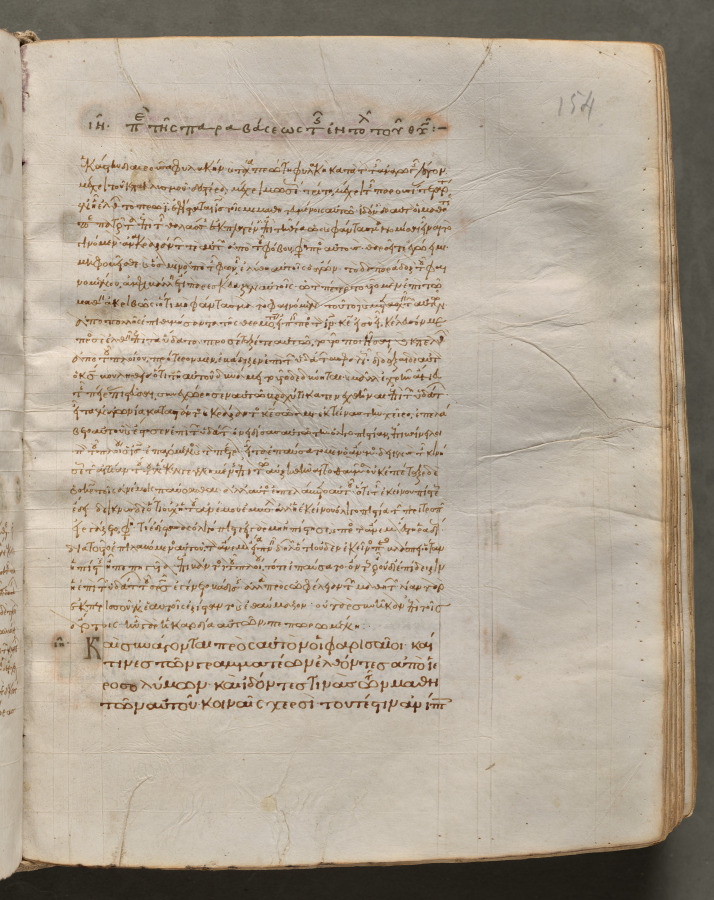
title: Text, folio 154 (recto), from a Gospel Book with Commentaries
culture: Byzantium, Constantinople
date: c. 1000–1100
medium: ink, tempera, and gold on vellum; leather binding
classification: Bound Volume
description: Each of the four gospels in this book opens on a page with brilliantly illuminated borders depicting the author of the text as well as birds-principally peacocks, symbols of the immortality of the soul-and fountains, representing the fountain of life and the salvation of the soul. This volume consists of 428 leaves with texts in Greek. Its level of sophistication suggests that it was probably written and decorated in a monastery in Constantinople.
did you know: Gospel Books were carried in procession through Byzantine churches.